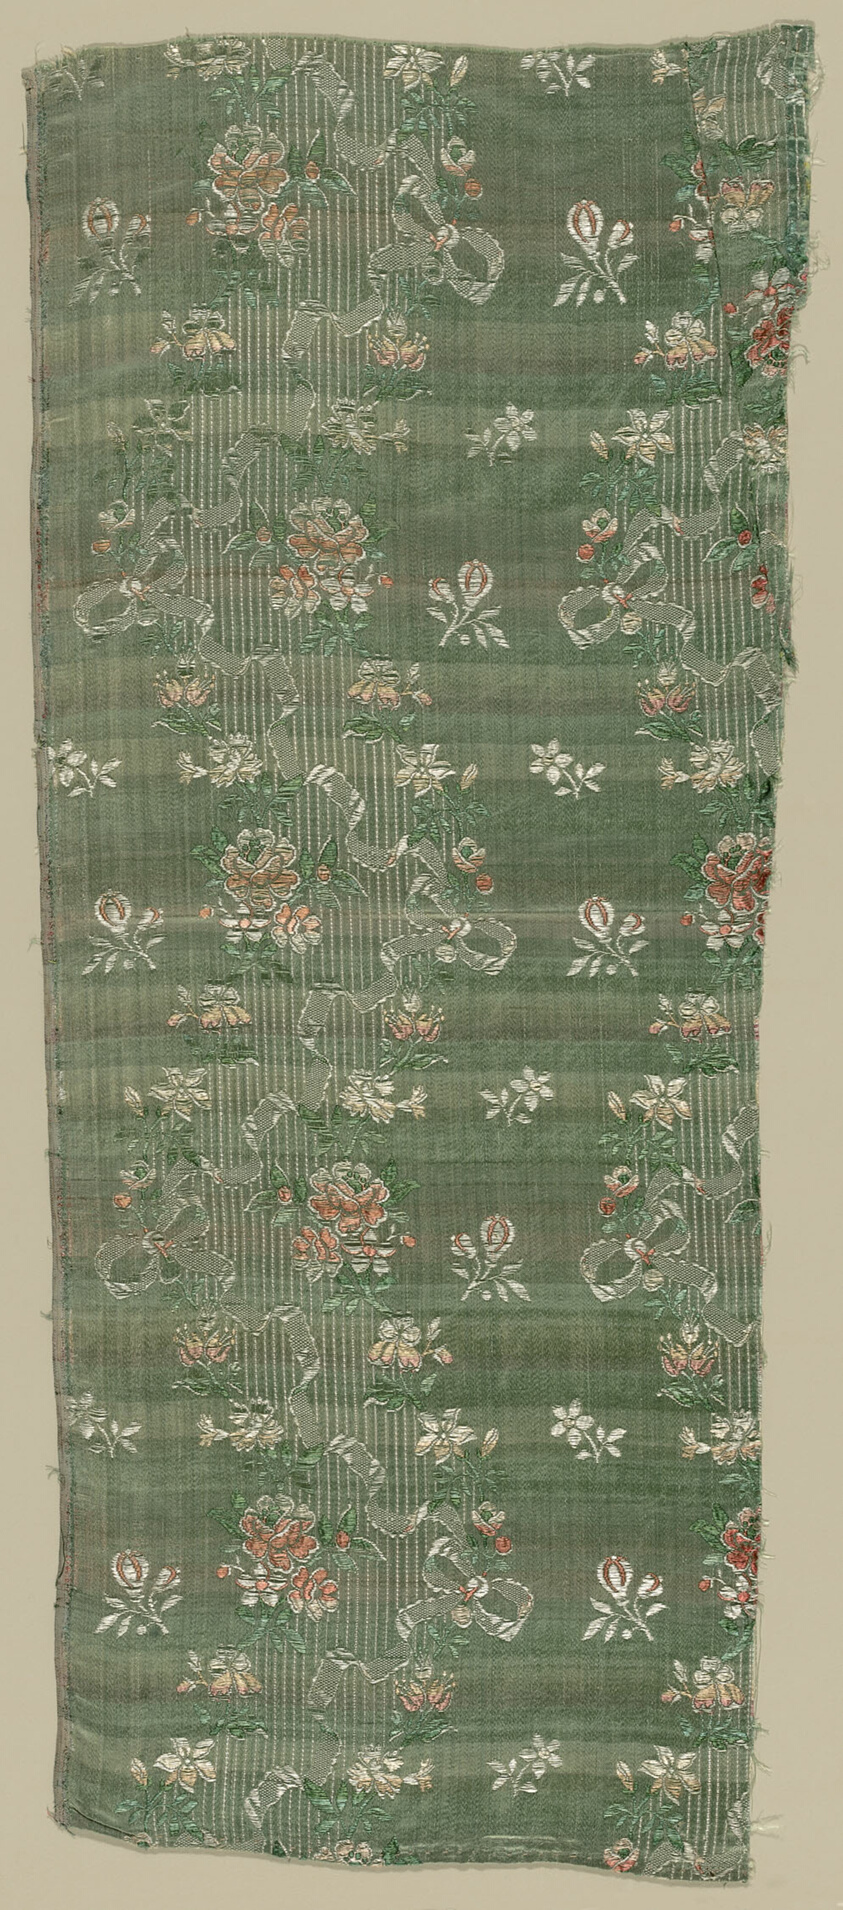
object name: Textile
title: Panel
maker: France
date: 1775/1800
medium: silk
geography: France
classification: textile; weaving